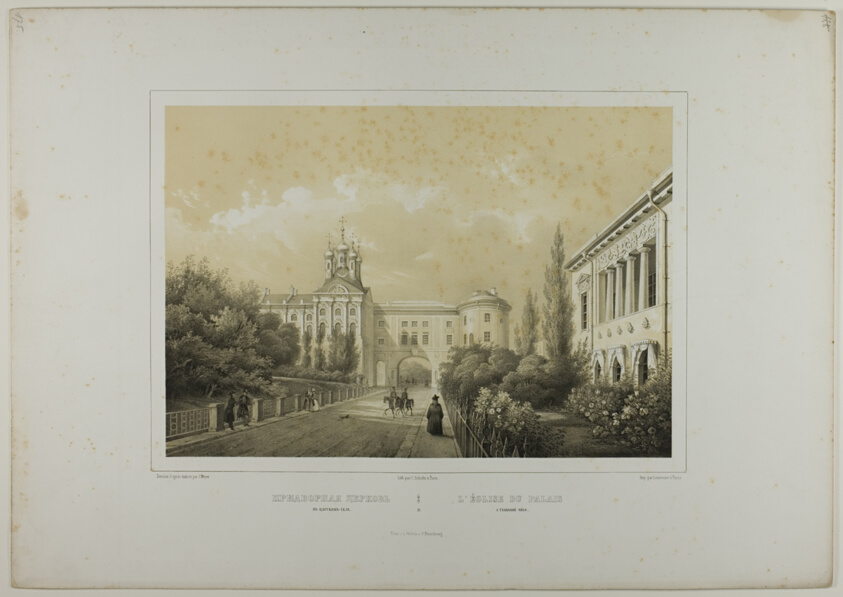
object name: Print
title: The Church at the Tsarskoé-Sélo Palace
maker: C. Schultz (possibly German, active. c. 1820-1830); after J. Meyer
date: c. 1820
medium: Lithograph in black with second fawn tint stone on ivory wove paper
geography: Germany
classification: lithograph; print; prints and drawing